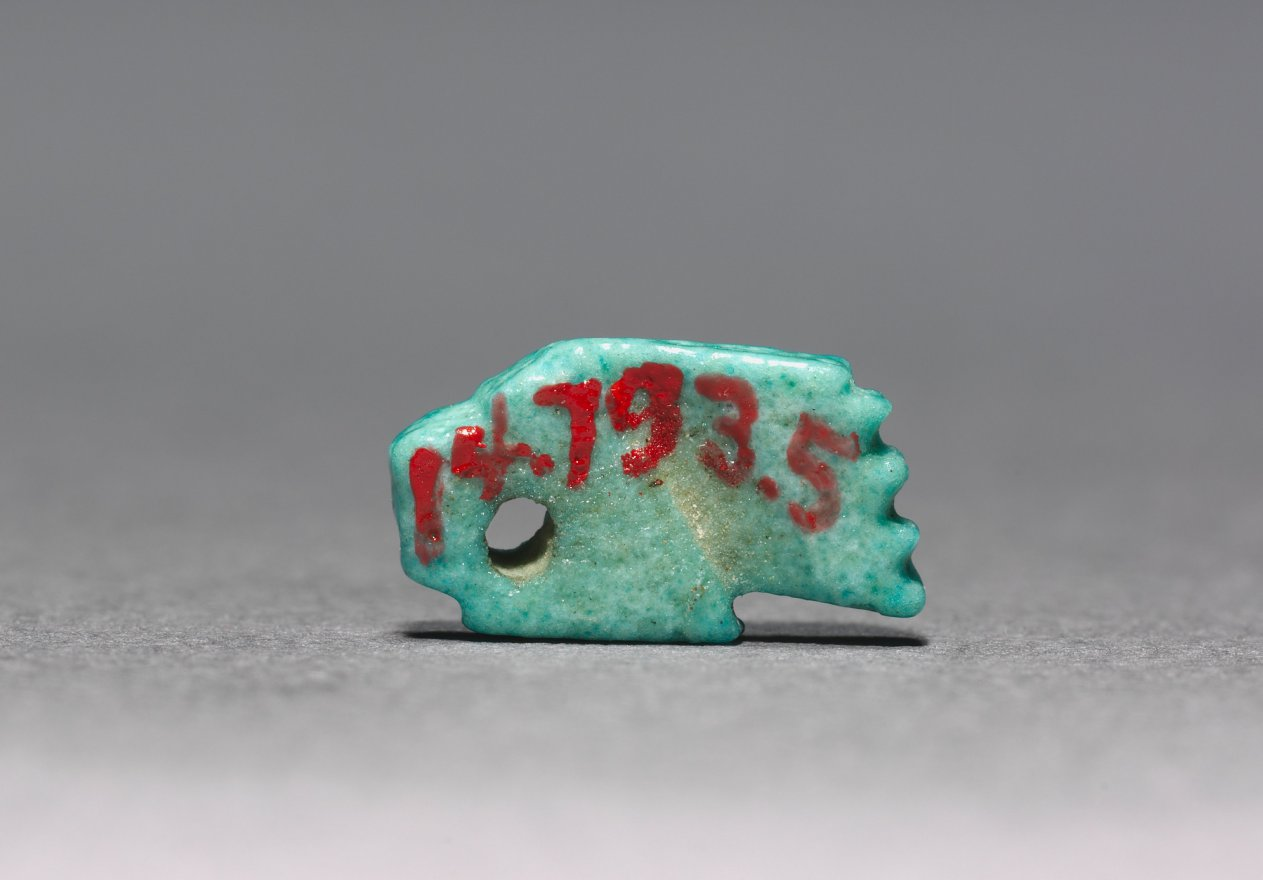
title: Hand Amulet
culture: Egypt, Late period (715–332 BCE)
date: 715–332 BCE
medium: light turquoise green faience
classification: Amulets